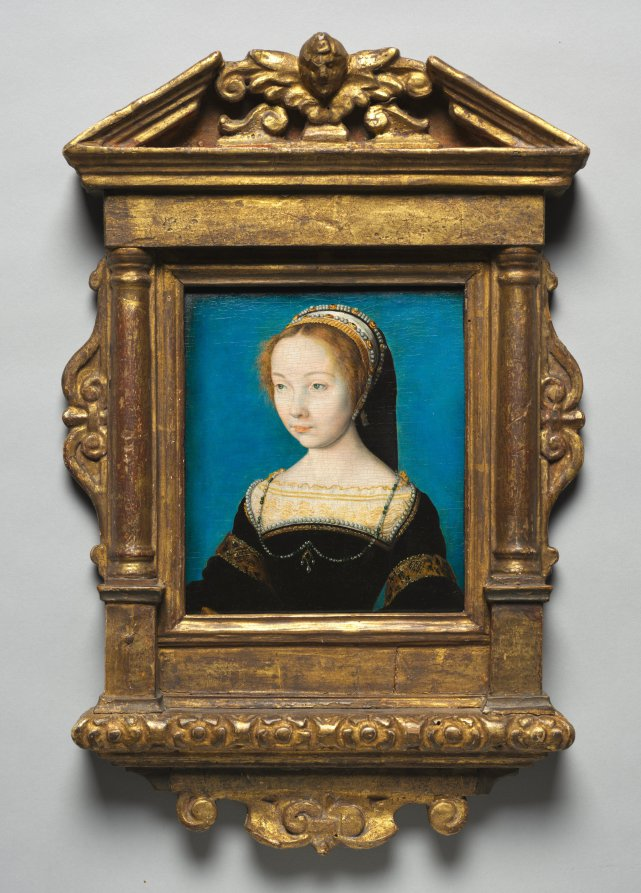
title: Portrait of a Woman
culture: Netherlandish, active France, 16th century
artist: Corneille de Lyon (Netherlandish, 1500/10–1574)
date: c. 1540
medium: oil on wood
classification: Painting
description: Corneille de Lyon worked both for the French court and wealthy merchants. His distinctive northern style stood in contrast to the taste for Italian Renaissance painting and connected closely to portrait miniatures and manuscript painting. Recent conservation treatment has restored the smooth, enamel-like background and the meticulous rendering of detail.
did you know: Gold leaf was applied to the details of the sitter’s headdress and embroidery on her dress.